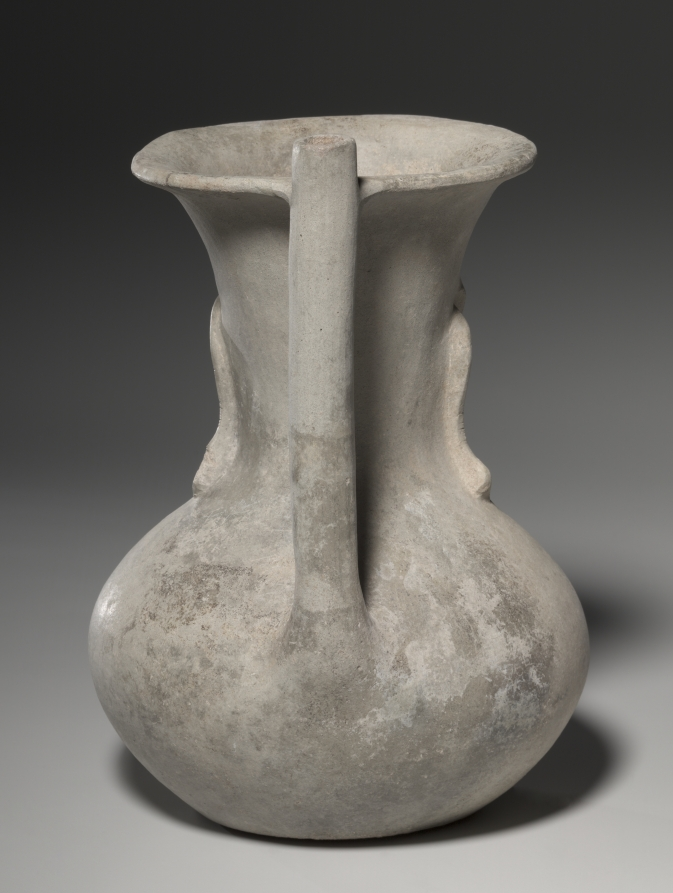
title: Figural Vessel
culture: Mexico, Oaxaca, Zapotec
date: c. 500–150 BCE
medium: earthenware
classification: Sculpture